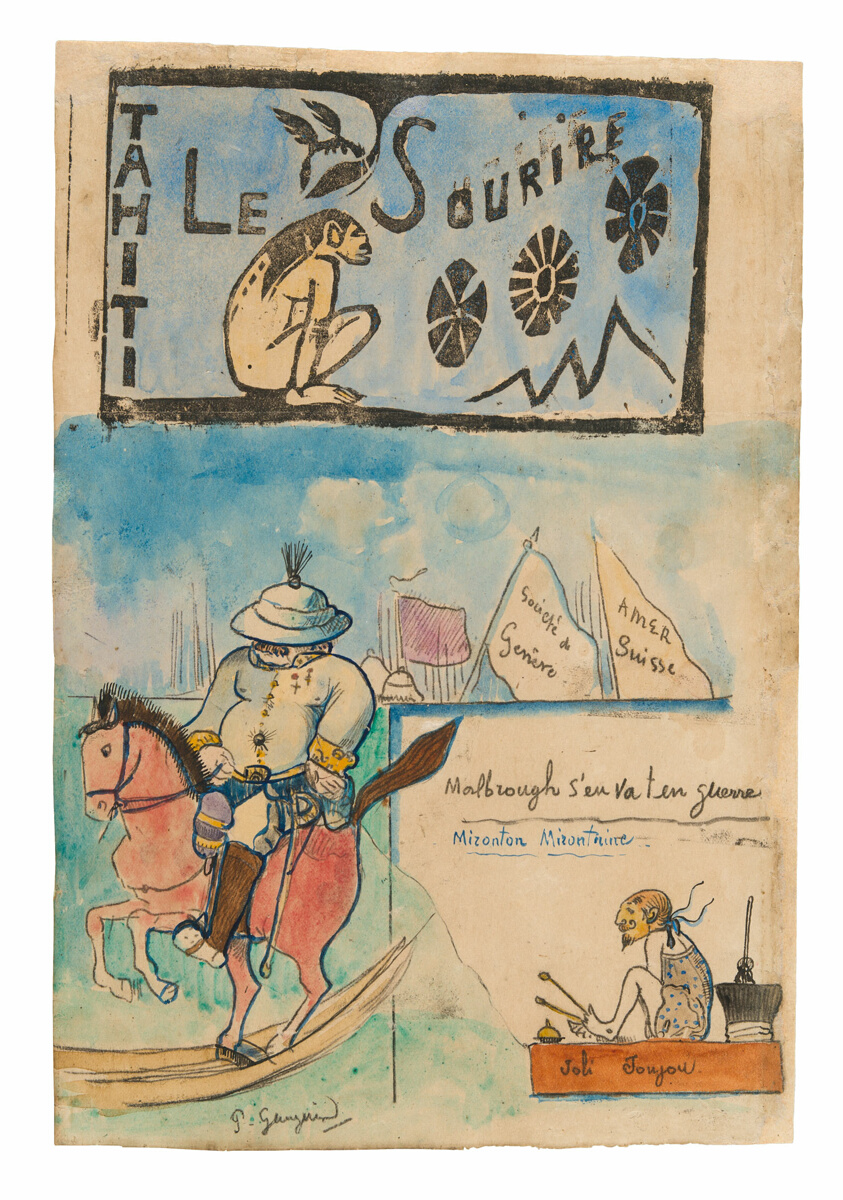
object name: Print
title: Caricatures of Gauguin and Governor Gallet, with headpiece from Le sourire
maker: Paul Gauguin (French, 1848-1903)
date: 1900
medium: Watercolor, with black colored pencil, and touches of pen and black ink, over a transfer drawing in black, and wood-block print in black ink with blue watercolor on cream wove paper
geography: France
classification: woodcut; print; prints and drawing